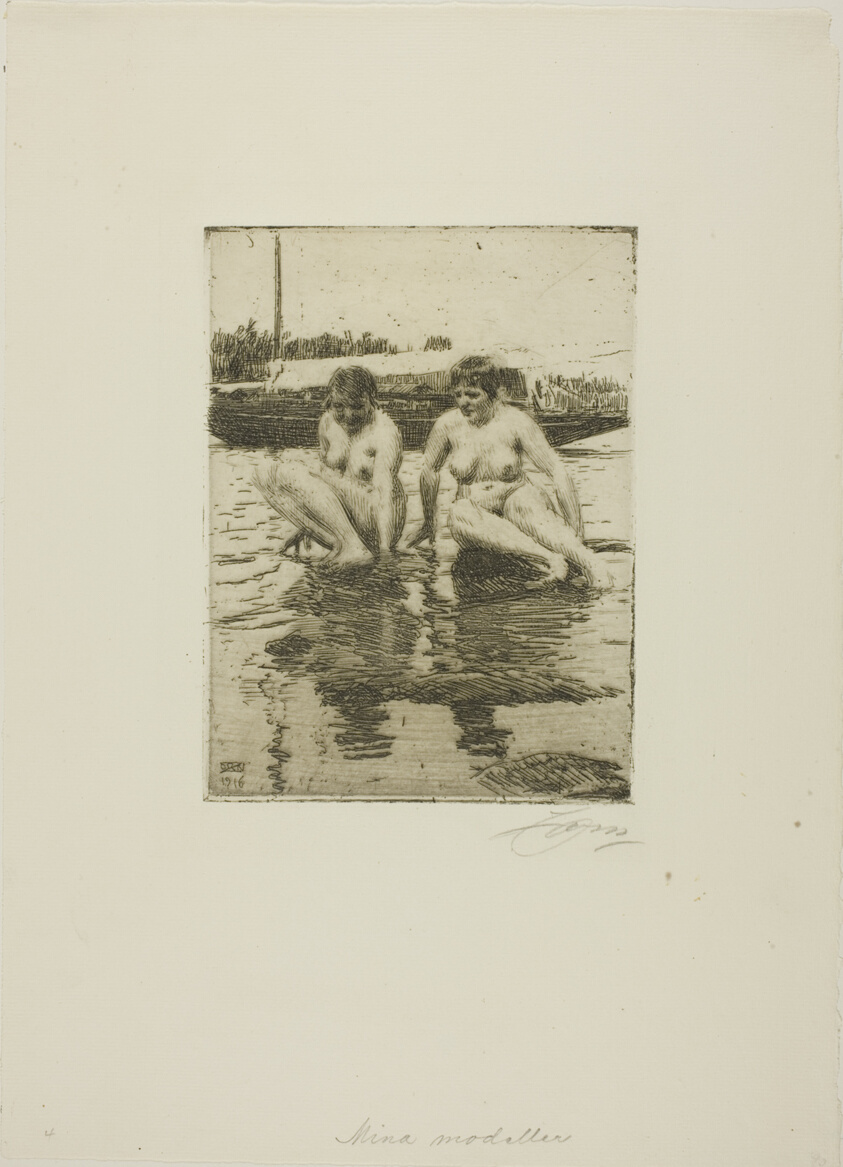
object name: Print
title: My Models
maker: Anders Zorn (Swedish, 1860-1920)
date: 1916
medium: Etching on ivory laid paper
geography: Sweden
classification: etching; print; prints and drawing